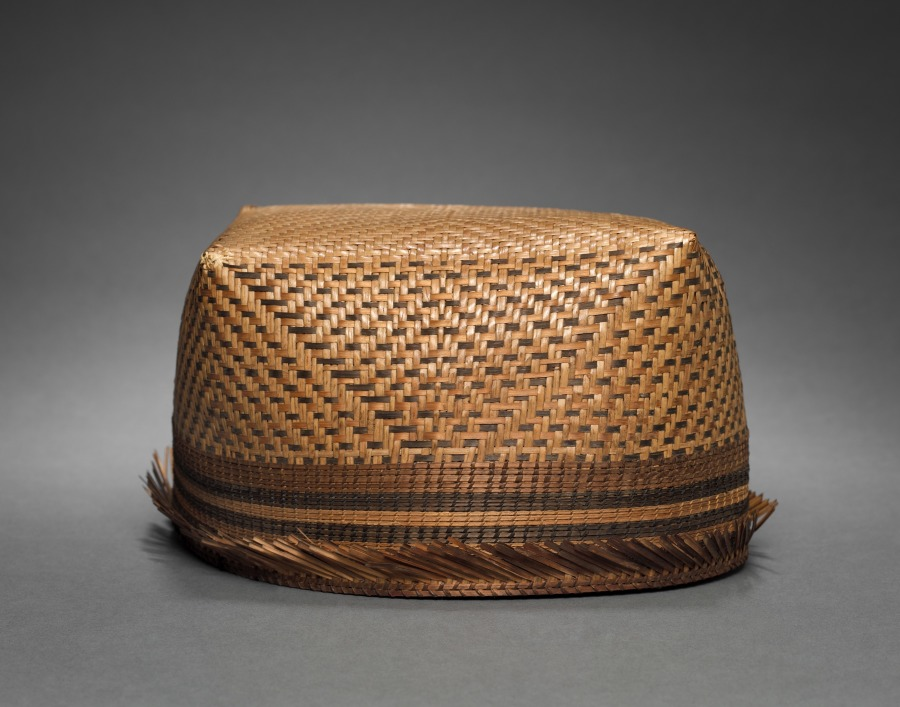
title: Hat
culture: Africa, Central Africa, Democratic Republic of the Congo, Mangbetu, 20th century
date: before 1929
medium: Plant fibers and dye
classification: Garment